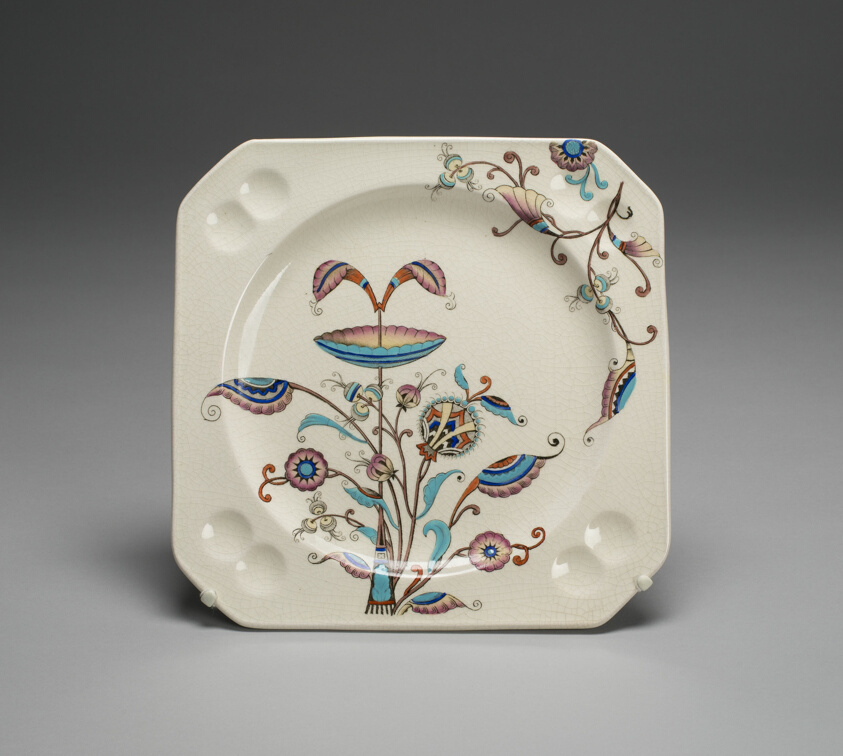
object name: Ceramics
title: Plate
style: Aestheticism, Art Nouveau, Aesthetic Movement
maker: Designed by Christopher Dresser (English, born Scotland, 1834-1904); Made by Old Hall Earthenware Co., Ltd. (Staffordshire, England, 1861-1866)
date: c. 1886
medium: Lead-glazed earthenware with polychrome enamels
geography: Hanley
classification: plate (general, dish); dish (vessel); earthenware; ceramics; european decorative arts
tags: persia